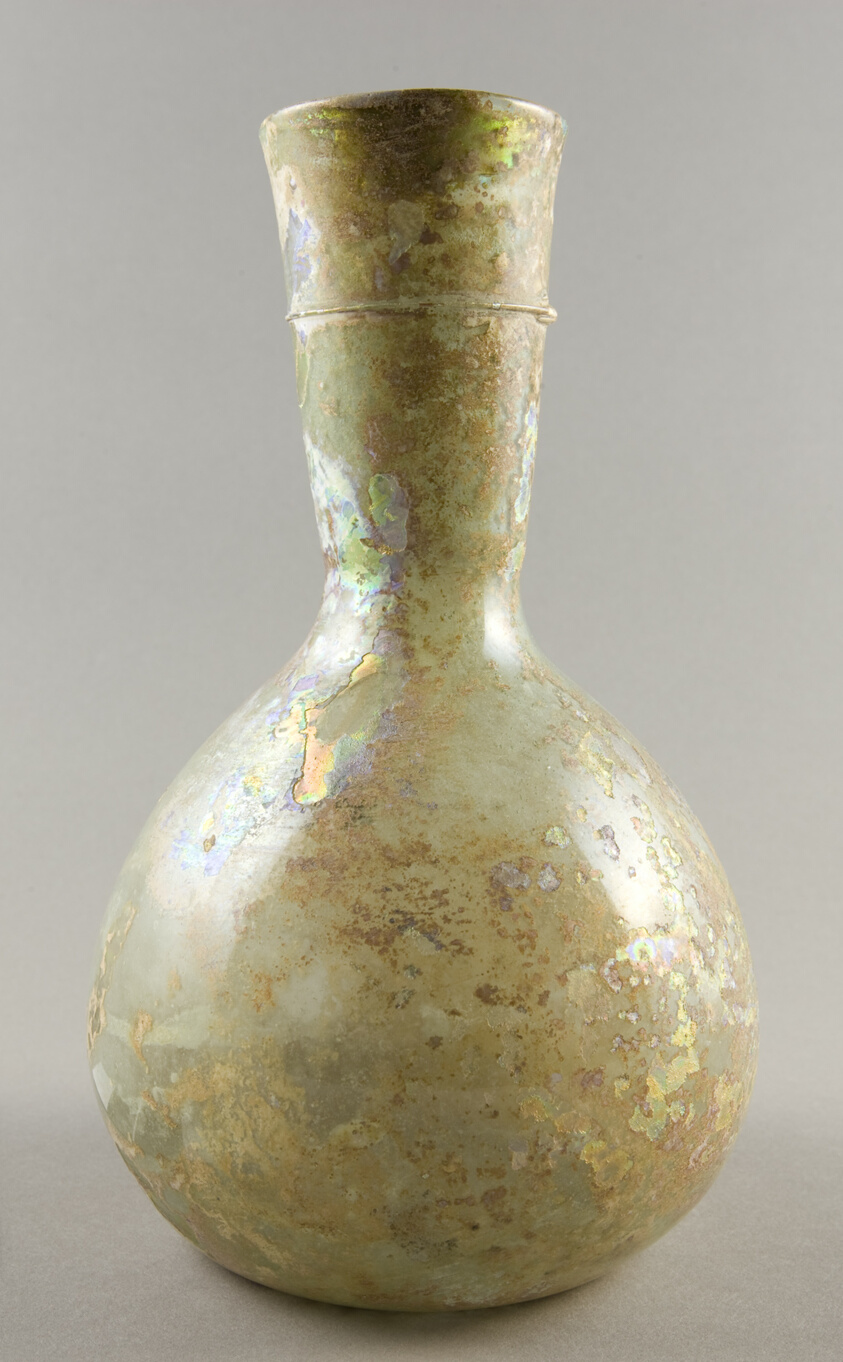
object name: Vessel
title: Vase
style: greco-roman, greco-roman (egyptian)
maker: Greco-Roman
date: 2nd-5th century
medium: Glass, blown technique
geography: Ancient Mediterranean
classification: glass; vessel; ancient art